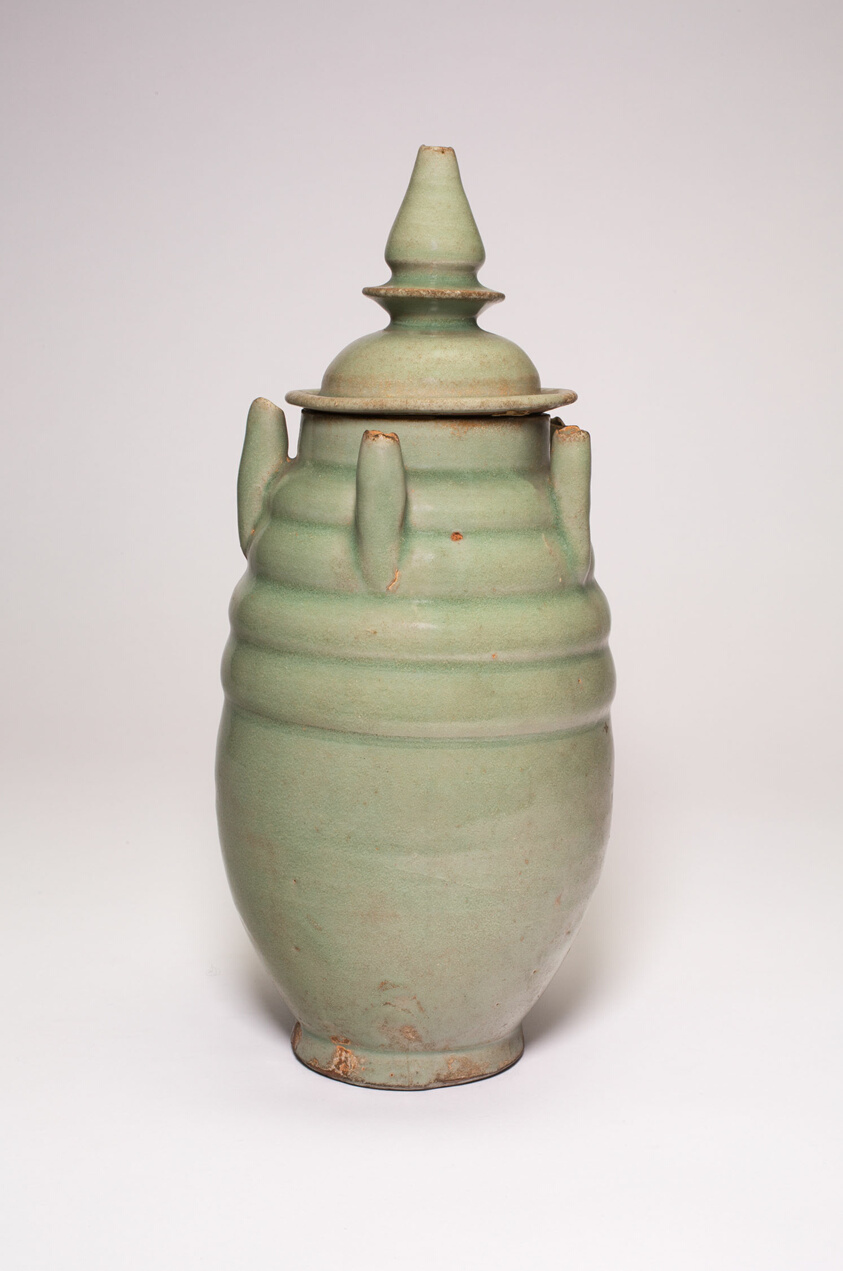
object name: Vessel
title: Covered Jar with Spouts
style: Chinese (culture or style)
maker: China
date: Song dynasty (960–1279) or later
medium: Stoneware with celadon glaze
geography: China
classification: stoneware; asian art; ceramics; vessel